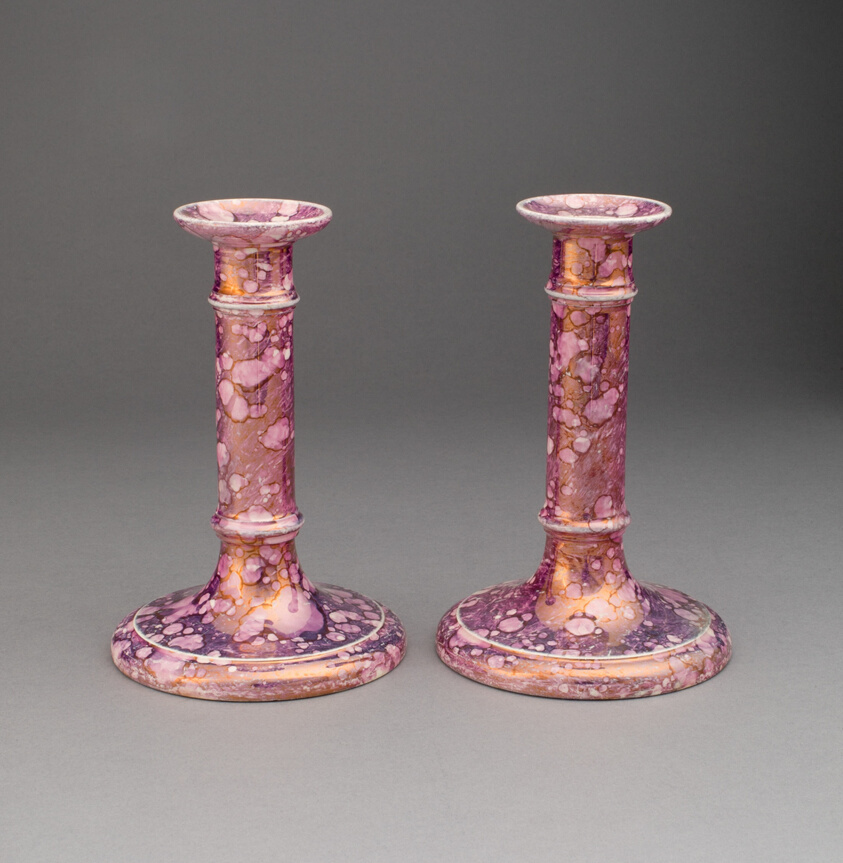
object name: Ceramics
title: Candlestick (one of a pair)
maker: England, Sunderland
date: 1810/20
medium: Lead-glazed earthenware with lustre decoration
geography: Sunderland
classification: candleholder - candlestick; earthenware; candleholder; european decorative arts; ceramics